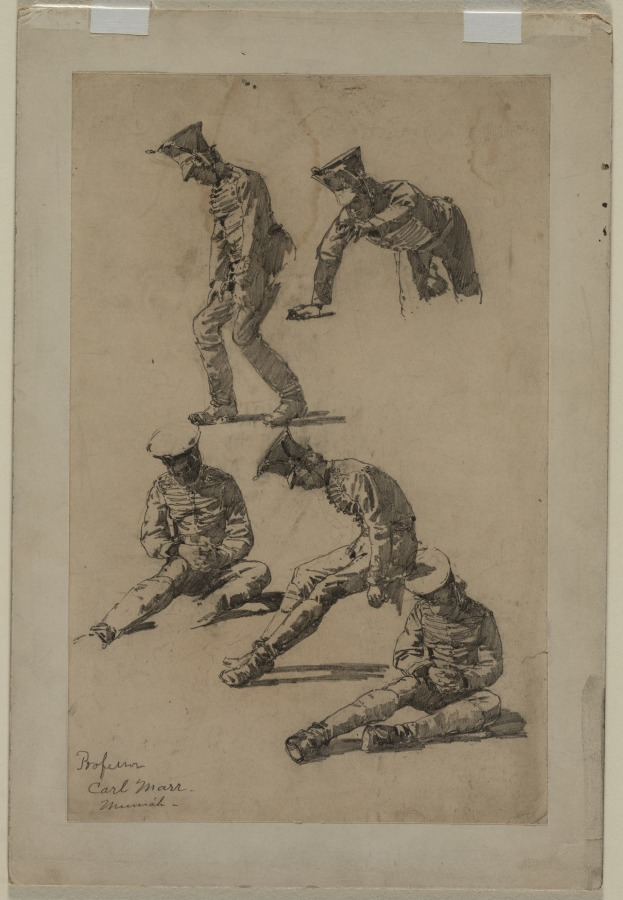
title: Five Studies of a Soldier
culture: America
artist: Carl Marr (American, 1858–1936)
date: fourth quarter 19th century or first third 20th century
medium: graphite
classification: Drawing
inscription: [signed ?], lower left, in graphite: Professor / Carl Marr- / Munich- ; VERSO OF SECONDARY SUPPORT, lower right, in graphite: 838. / 10 2[superscript] x 15 2[superscript]